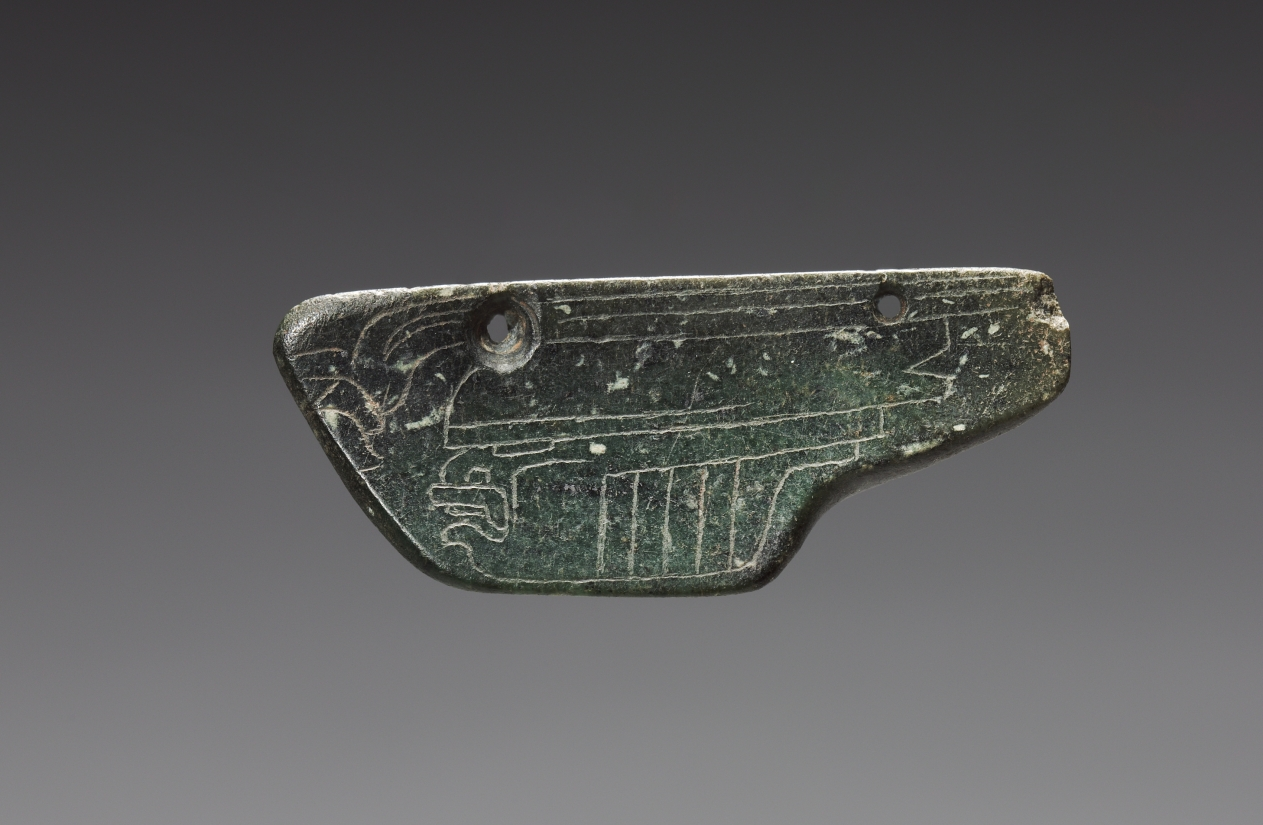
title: Mask Attachment(?)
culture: Mesoamerica, Mexico, Olmec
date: 900–300 BCE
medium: serpentine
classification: Sculpture